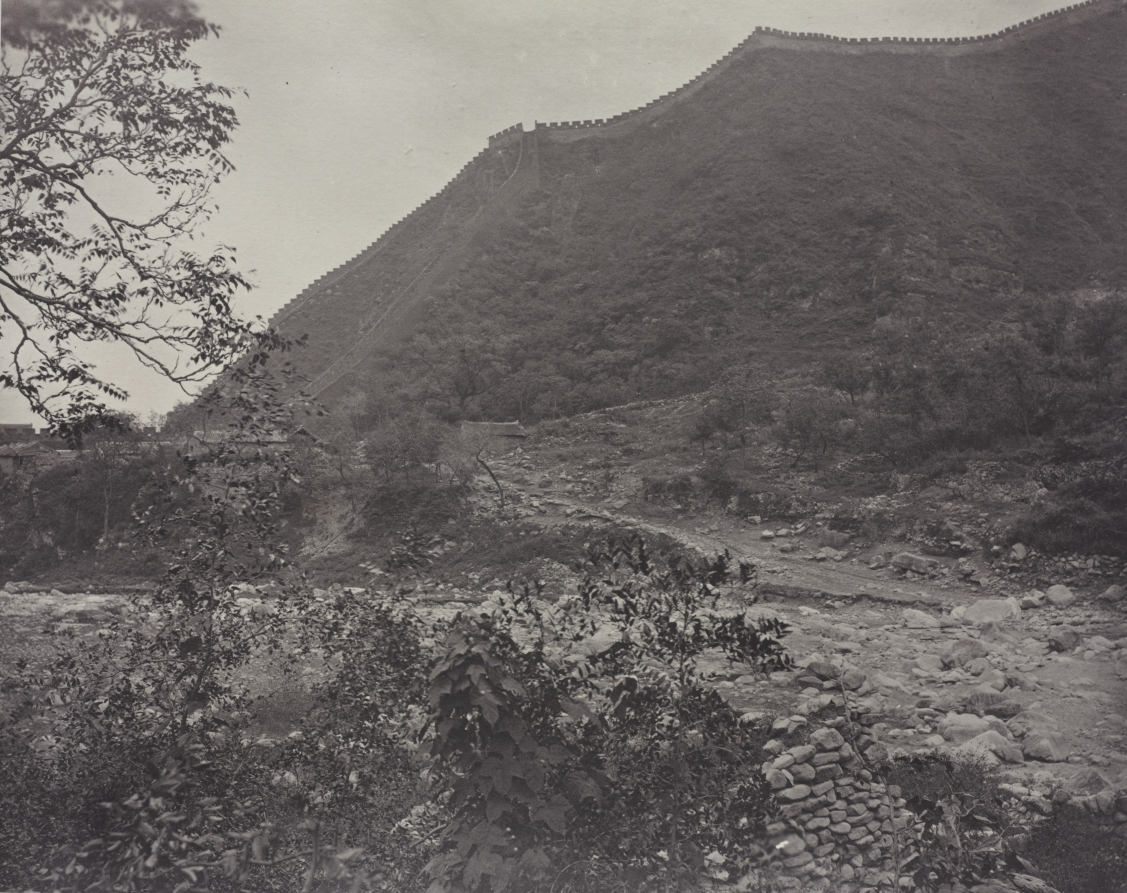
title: View of the Great Wall, China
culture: England, 19th century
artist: John Thomson (Scottish, 1837–1921)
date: c. 1871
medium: albumen print from wet collodion negative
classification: Photograph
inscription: Written in black ink on recto: "Vue de la grande muraille."